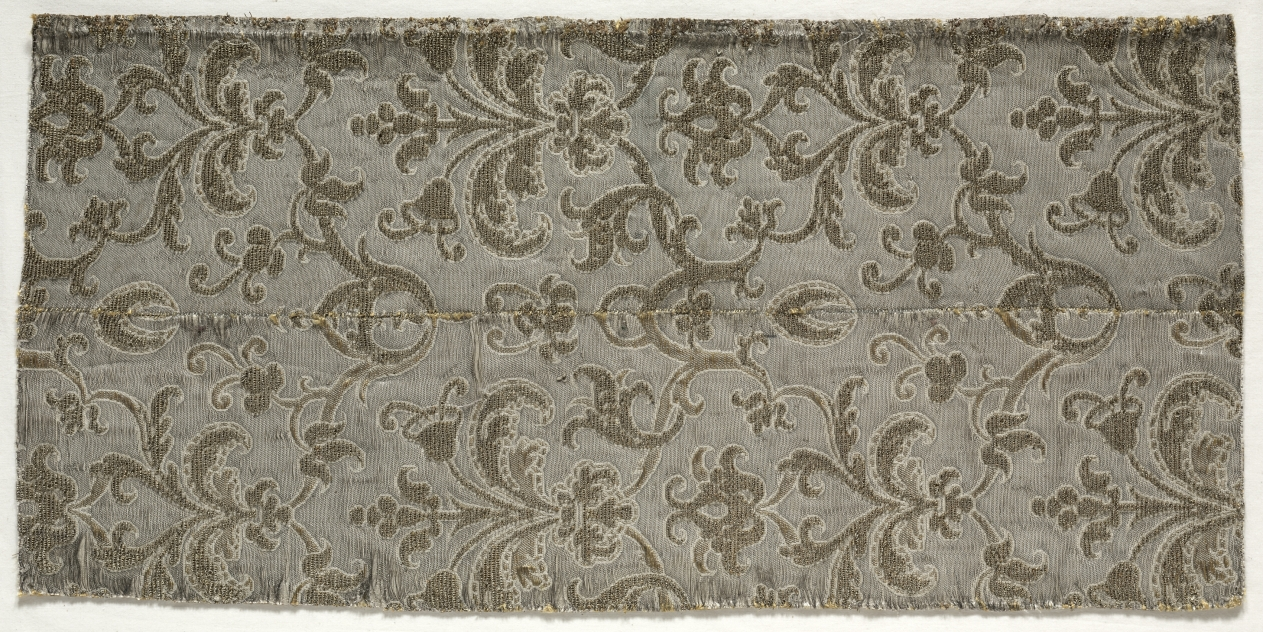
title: Gold and Silver Cloth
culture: Spain, late 16th century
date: late 16th century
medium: brocaded silk with metal thread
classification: Textile